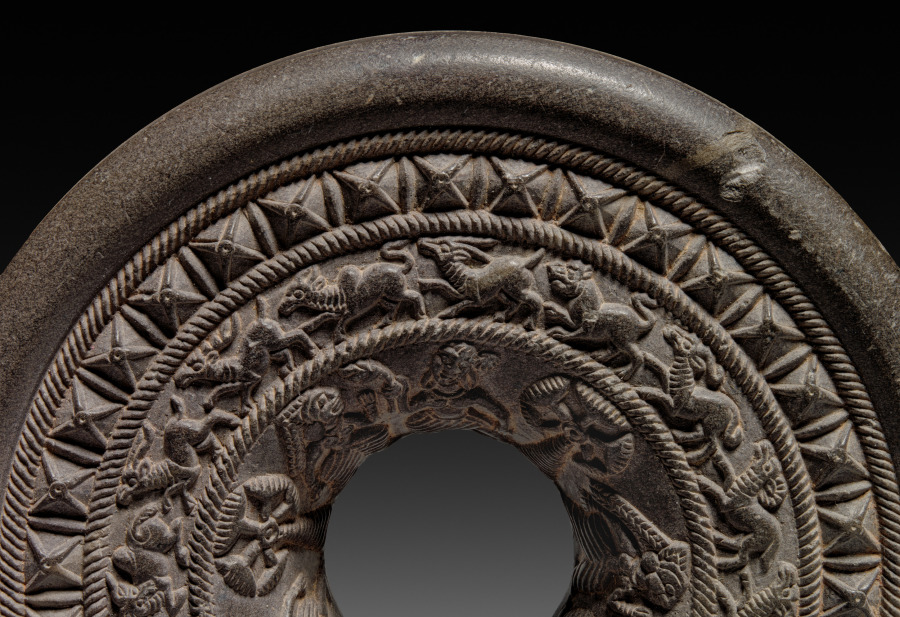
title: Ringstone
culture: India, Maurya period (322–185 BCE)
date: 200s BCE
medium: steatite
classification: Sculpture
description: Ringstones are among the earliest works of art to be created in stone during India's historical period. This example is finely carved with detailed images of affectionate couples and palm trees, running animals, and geometric motifs in concentric circles. The function of ringstones remains uncertain, since none of the surviving examples is inscribed or explained in a text.